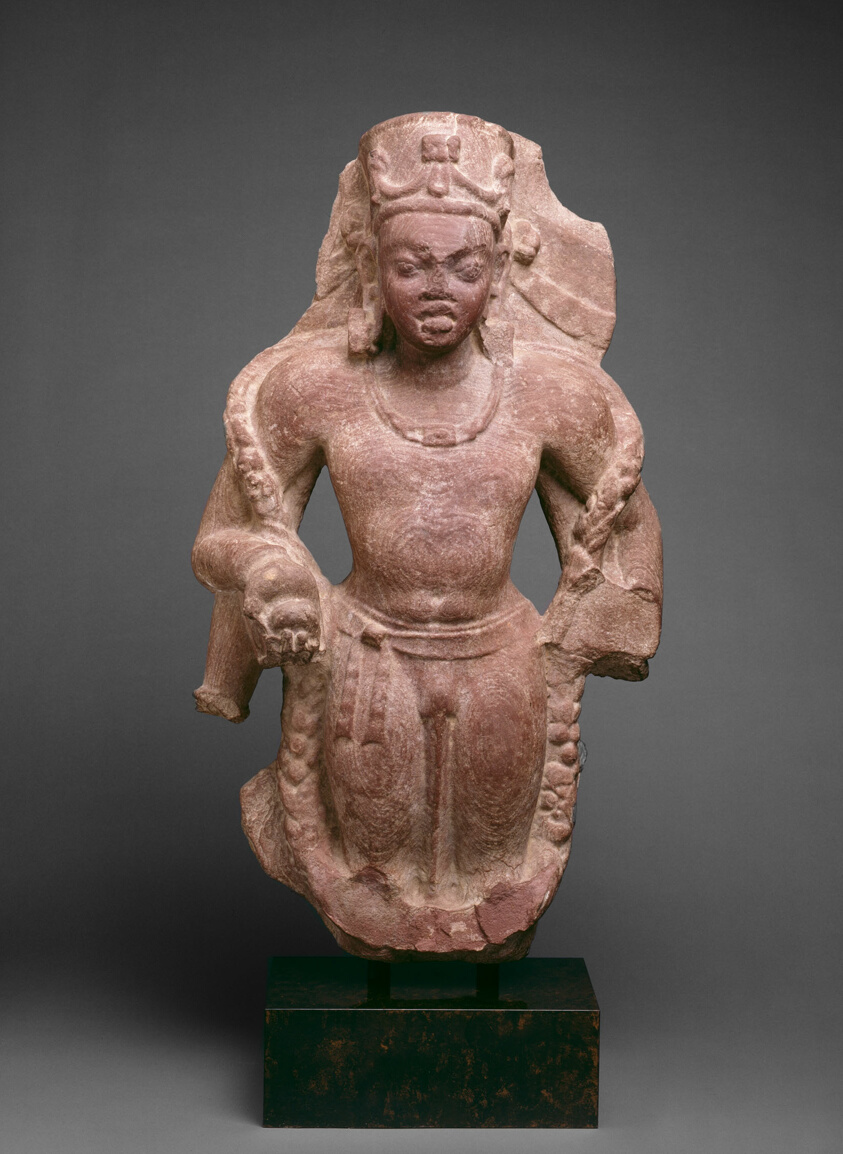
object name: Sculpture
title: Four-Armed God Vishnu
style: South Asian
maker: India; Uttar Pradesh, possibly Allahabad region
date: c. 5th century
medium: Sandstone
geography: Uttar Pradesh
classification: sandstone; stone; sculpture; asian art